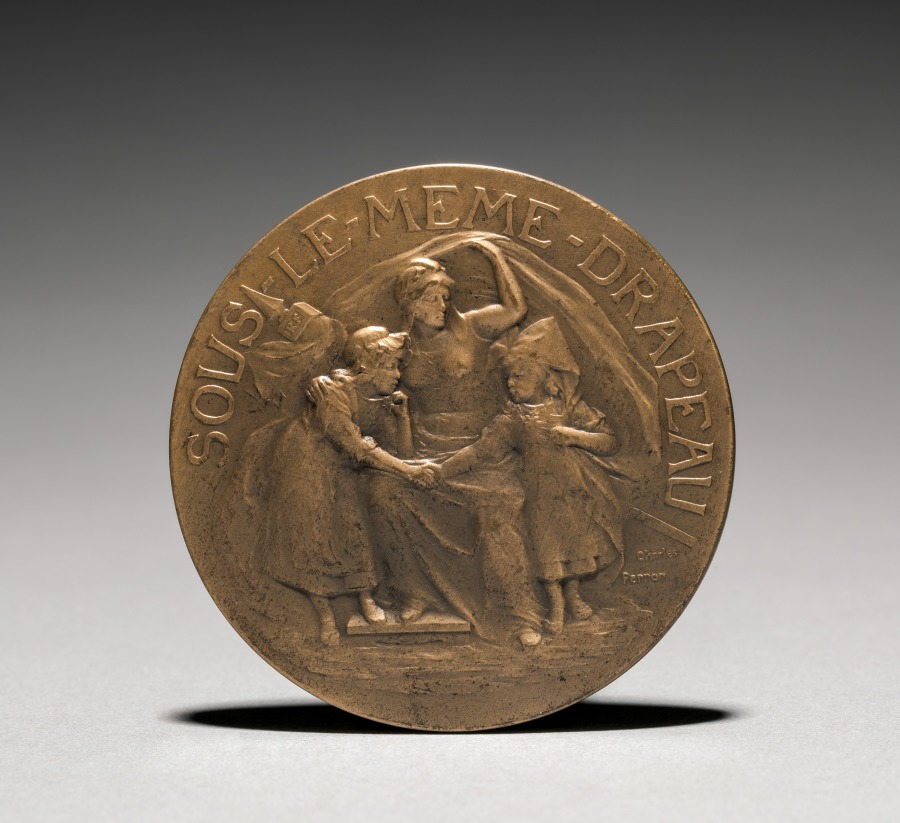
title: Medallion (obverse)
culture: France, 19th-20th century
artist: Charles-Theodore Perron (French, 1862–1934)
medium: bronze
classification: Metalwork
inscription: "SOUS LE MEME DRAPEAU" (Under the Same Flag); signed: "Charles Perron."